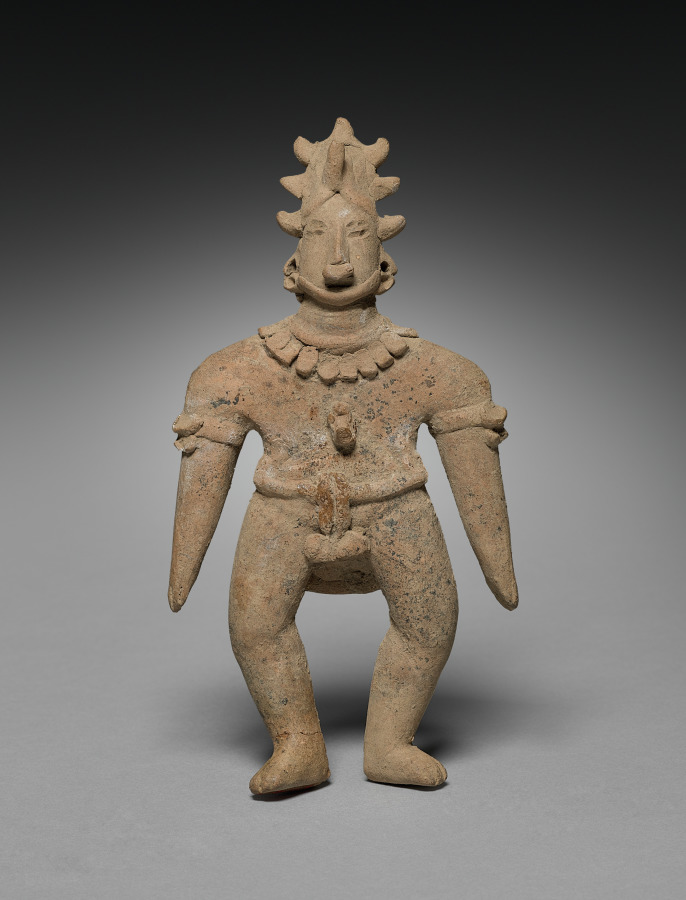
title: Flat Male Figure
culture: Mesoamerica, West Mexico, Colima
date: 200 BCE–300 CE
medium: ceramic, pigment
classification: Sculpture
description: Clay figurines were the earliest and most common art form in Mexico and other countries in the ancient Mesoamerican (Middle American) culture region. Made first by hand and later with molds, most figurines belong to the traditions of commoners, such as farmers, rather than those of elites.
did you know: Clay figurines were the earliest and most common art form in the ancient Mesoamerican culture region.